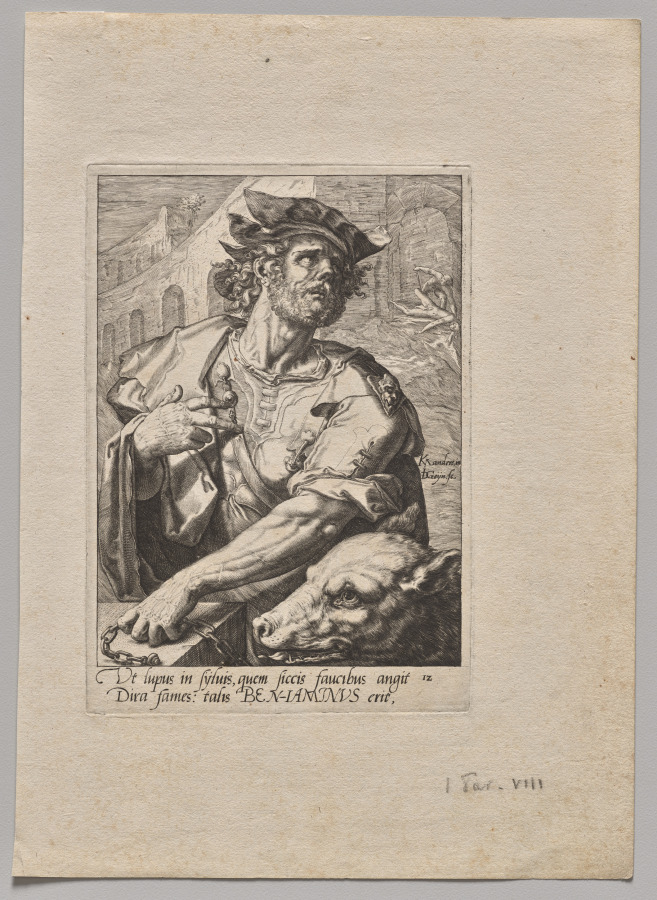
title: Plate 12: Benjamin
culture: Netherlands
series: The Twelve Sons of Jacob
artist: Jacob de Gheyn II (Netherlandish, 1565–1629)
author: after Karel I van Mander (Netherlandish, 1548–1606)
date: c. 1589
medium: engraving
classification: Print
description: In this print, the biblical figure Benjamin holds a wolf by a chain while an act of violence takes place behind him, denoting his ferocity in battle. This is one of a series of prints depicting the twelve sons of Jacob, each with an attribute and costume that denotes his character. According to the Old Testament, Jacob blessed each of his twelve sons, prophesizing the destiny of their tribe, and assigning them a parcel of land in Canaan. The print series was made in the Netherlands in the late 16th century, a time of political struggle when Old Testament heroes were popular exemplars of fortitude and patience.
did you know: The appearance of a wolf in this print illustrates the Old Testament prophesy of Jacob, that “Benjamin is a ravenous wolf; In the morning he devours the prey, And in the evening he divides the spoil (Genesis 49:28).